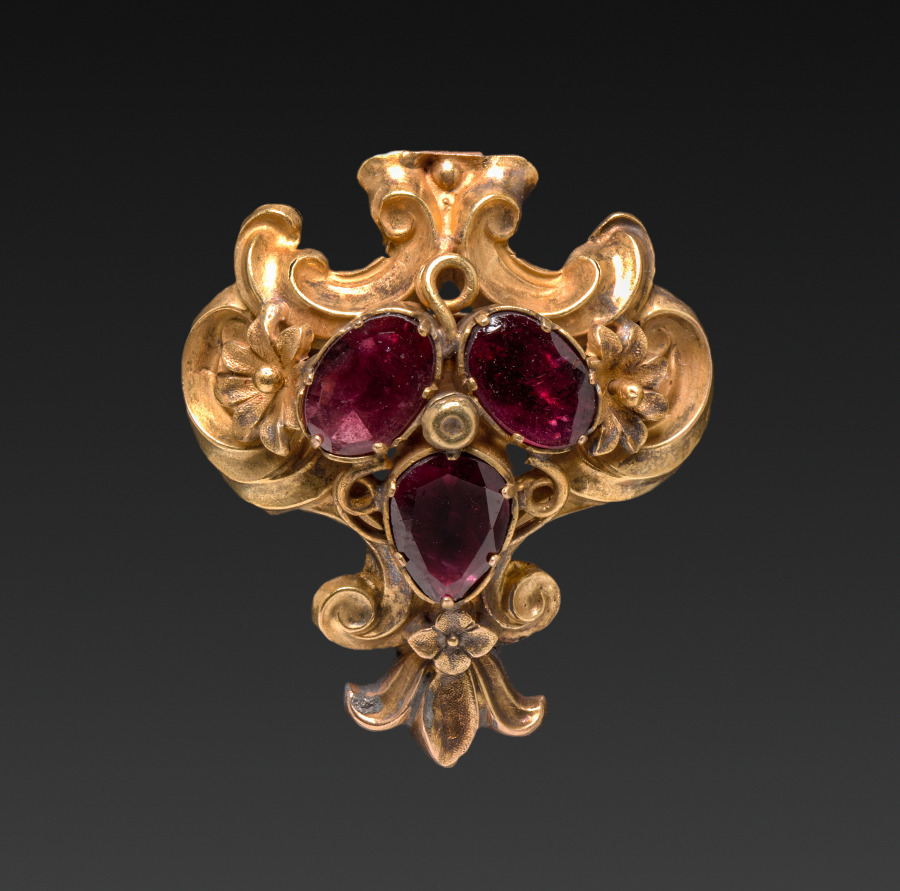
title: Earring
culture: Germany, possibly, 19th century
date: c. 1840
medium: gold and jewels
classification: Jewelry